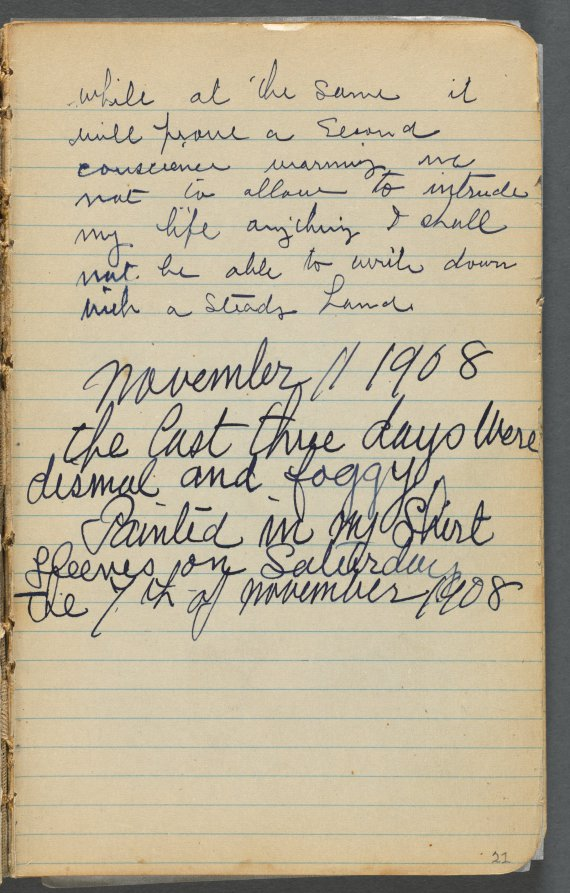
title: Sketchbook, page 021: Notes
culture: America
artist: Maurice Prendergast (American, born Newfoundland [now Canada], 1858–1924)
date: 1905–10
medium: graphite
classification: Bound Volume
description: This sketchbook contains 69 pages of drawings, a diary largely devoted to the state of the artist's health, and a three-page discourse on the nature of genius and ideas.